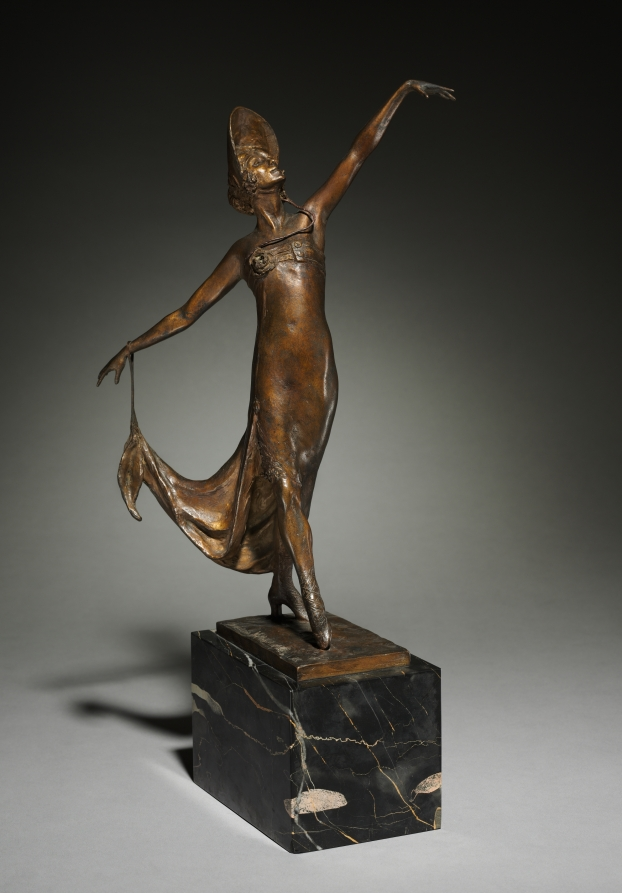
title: Pavlova Dancing the Gavotte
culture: America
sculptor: Malvina Hoffman (American, 1887–1966)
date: 1915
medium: bronze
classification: Sculpture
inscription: Signed on base: "Malvina Hoffman 1915, IX ©"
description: Sculptor Malvina Hoffman met the acclaimed Russian ballerina Ana Pavlova in New York during the spring of 1914. This bronze rendering of the dancer, posed with broadly outstretched arms, was created the following year. At the time, Pavlova was attempting to popularize a Russian version of the French folk dance known as the gavotte.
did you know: A pavlova is a meringue-based dessert inspired by the shape of ballerina Anna Pavlova's tutu.